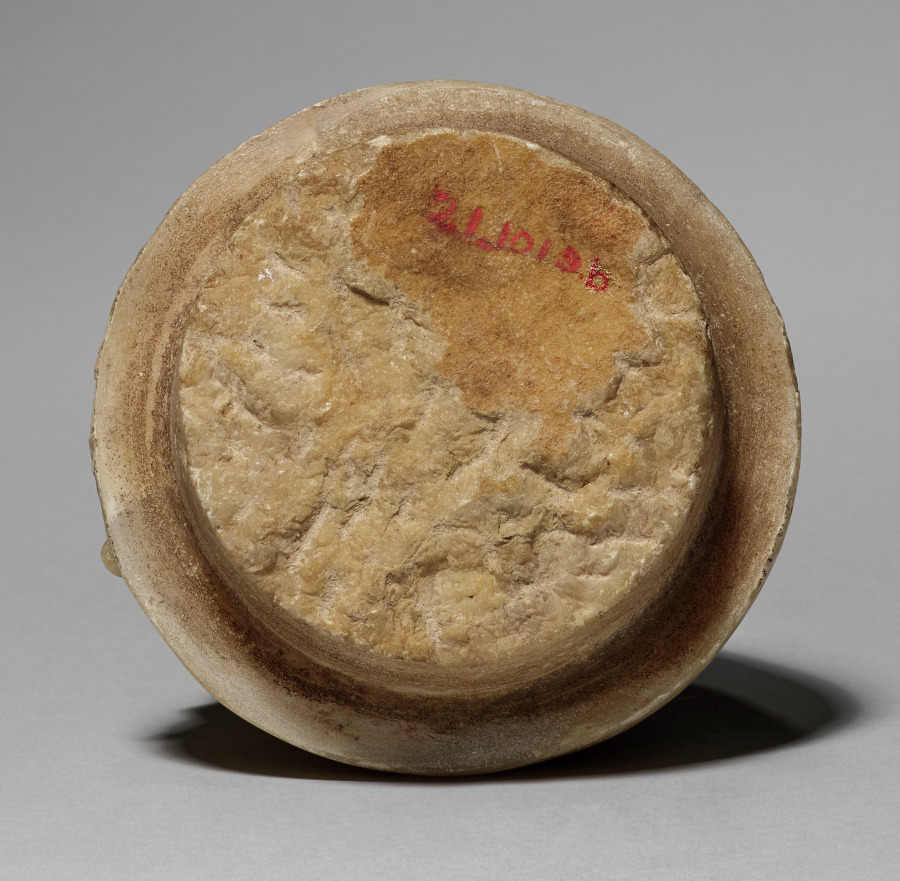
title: Canopic Jar with Man's Head (lid)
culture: Egypt, Late period (715–332 BCE), Dynasty 26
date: 664–525 BCE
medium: travertine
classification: Funerary Equipment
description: In the process of mummification, the liver, lungs, stomach, and intestines were removed, separately embalmed, and stored in specialized jars known as canopic jars (after a sailor in Greek mythology, who died at the town of Canopus in the Nile Delta and was worshipped there in the form of a human-headed jar). Each organ was identified with one of four funerary deities collectively known as the Sons of Horus: the liver with Imsety (man's head), the lungs with Hapy (baboon's head), the stomach with Duamutef (jackal's head), and the intestines with Qebehsenuef (falcon's head). It was their duty to protect the deceased and restore to him his body parts in the hereafter.